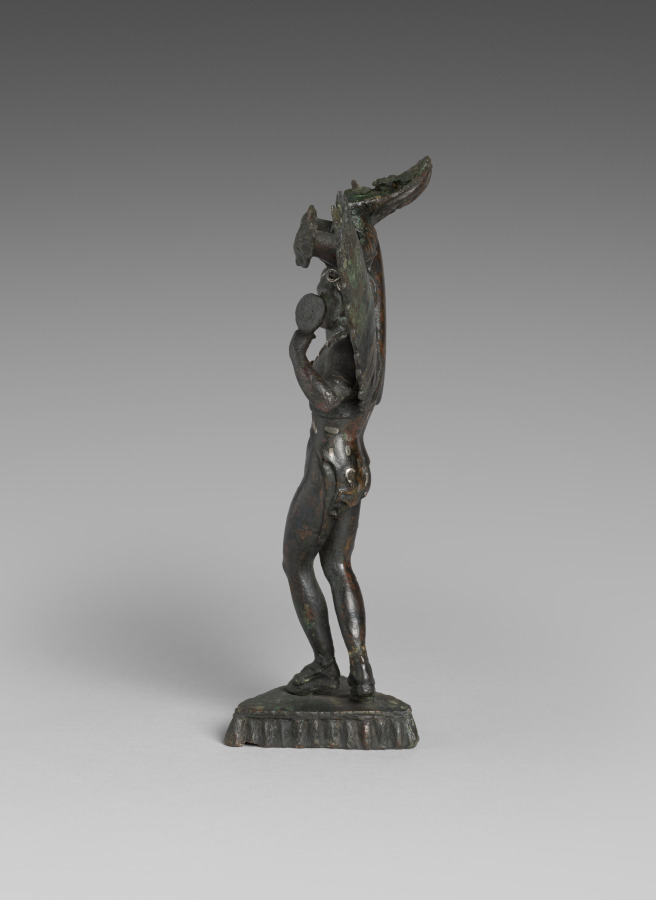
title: Patera Support: Lasa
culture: Etruscan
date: 300–175 BCE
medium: bronze with silver inlays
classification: Sculpture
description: Standing on a triangular base, this winged female figure twists her body while admiring herself in the small mirror held in her left hand. Nearly nude, she wears sandals as well as a leopard or panther skin and jewelry inlaid with silver. Above her head and wings, a small portion of a patera, or shallow offering dish, survives. Inscriptions identify similar winged female figures elsewhere in Etruscan art as Lasas, often together with Turan (an Etruscan goddess analogous to the Greek Aphrodite).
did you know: This elaborate figure served as a handle or support for a patera, a shallow dish.